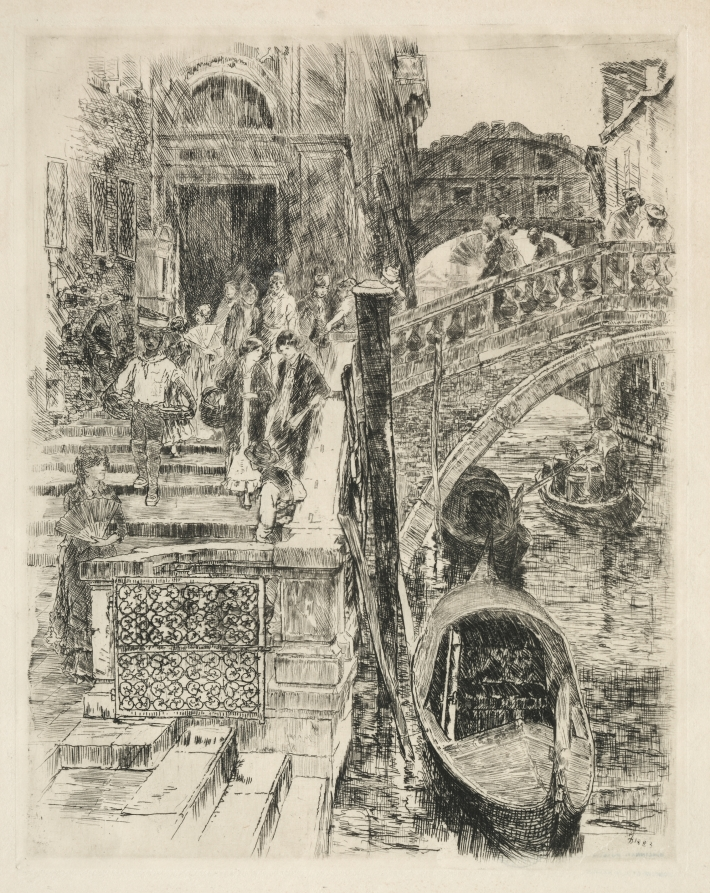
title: Bridge of Sighs, Venice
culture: America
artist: Frank Duveneck (American, 1848–1919)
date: 1883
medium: etching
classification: Print